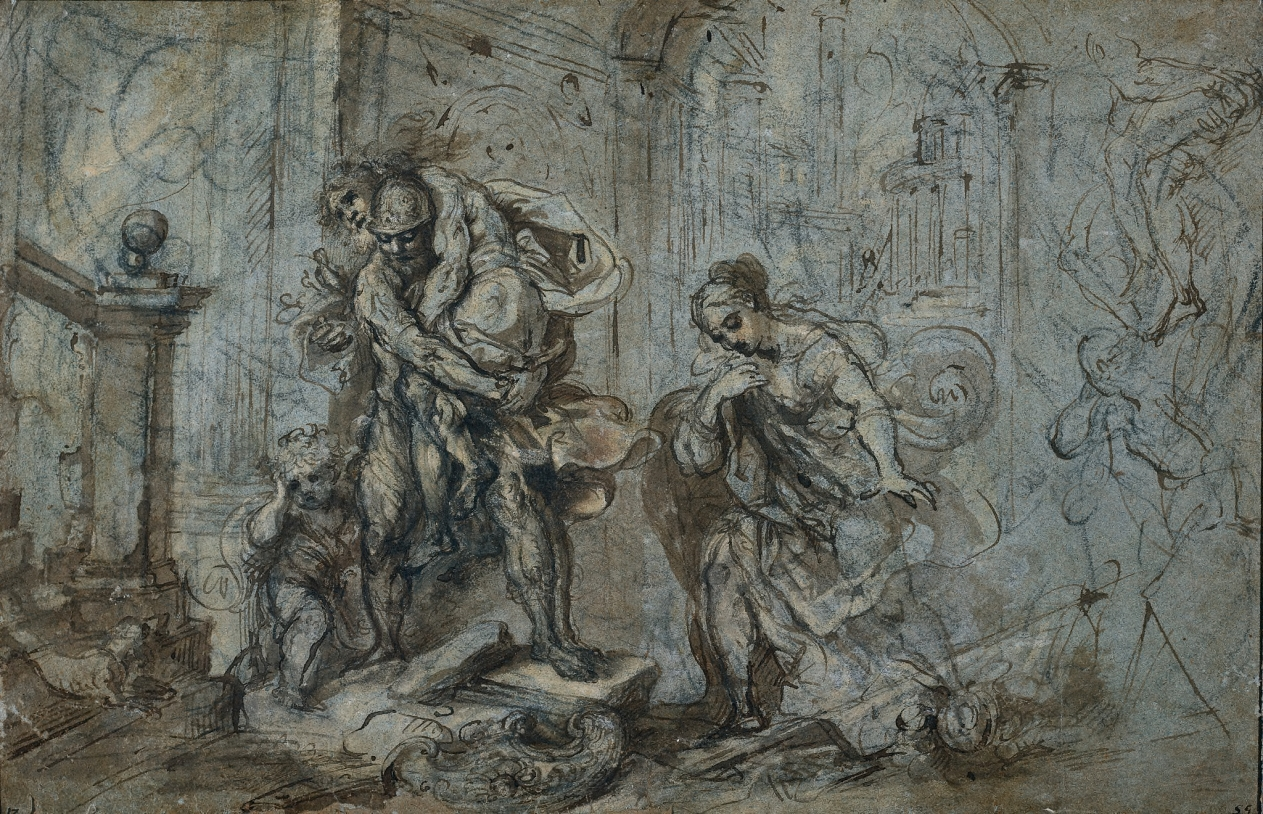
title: Aeneas Saving Anchises at the Fall of Troy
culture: Italy, 16th century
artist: Federico Barocci (Italian, 1528–1612)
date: 1587–88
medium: Pen and brown ink, brush and brown wash and yellow gouache heightened with traces of white, over black chalk, with stylus (banister); framing lines in pen and brown ink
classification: Drawing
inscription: lower left, in brown ink: 17 ; lower right, in brown ink: [illegible] ; lower right, in brown ink: 55 ; VERSO OF SECONDARY SUPPORT, center, in brown ink: Intagliato da Agostino Caracci. Il quadro è in Casa Borghese . [sideways] ; upper right, in graphite: 2767 [circled]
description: In book two of Virgil's epic poem The Aeneid (29-19 BC), the Trojan hero Aeneas escapes from the burning city of Troy and its Greek invaders with his family. Here the artist shows them making their way through a classical corridor. Aeneas carries his elderly father, Anchises, entrusted with holding their household gods. Aeneas holds the hand of his son, Ascanius, and his wife Creusa follows behind. Creusa's separation from the group alludes to her fate: she will fall behind and not survive their flight. Quick sketches on the right border of the sheet show Barocci practicing the balancing pose of Aeneas as he carries his father, and the stance of Creusa. The drawing relates to a now lost painting by Barocci and was also made into an engraving by Agostino Carracci (see CMA 1963.456). Details in the drawing such as the dog bounding down the stairs and Creusa's flowing hair and head scarf do not appear in the engraving.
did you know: This drawing may have been once owned by the painter Peter Paul Rubens (1577–1640).